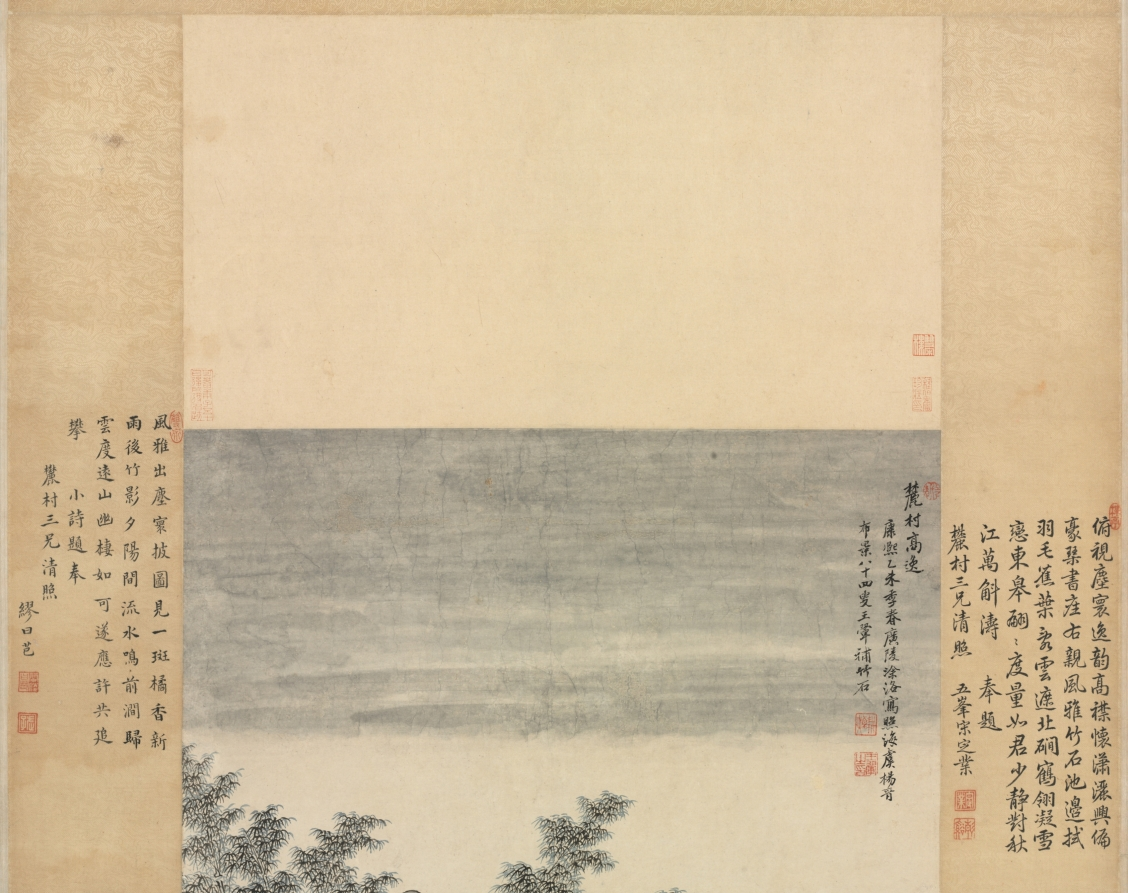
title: Portrait of An Qi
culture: China, Qing dynasty (1644-1911)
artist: Wang Hui (Chinese, 1632–1717)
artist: Tu Luo (Chinese, active c. 1715)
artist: Yang Jin (Chinese, 1644–1728)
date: 1715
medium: hanging scroll; ink and color on paper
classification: Painting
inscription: [印]上下千年. 麓村高逸：康煕乙未季春，廣陵涂洛寫照，海虞楊晉布景，八十四叟王翬補竹石。[印]耕煙; 王翬之印.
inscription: 俯視塵寰逸韻高，襟懷潚灑興偏豪。/ 琴書座右親風雅，竹石池邊拭羽毛。/ 蕉葉亂雲遮北礀，鶴翎凝雪戀東皋。/ 翩翩度量如君少，靜對秋江萬斛濤。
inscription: 知君頗好道，作意洗緐縟。/ 遂窮林亭勝，翛然契幽獨。/ 自得會忘言，餘善時往復。/ 岸幘若有期，把卷一停讀。/ 鶴馴行載正，雲閑斷還續。/ 橘柚欎寒煙，芭蕉瀉深綠。/ 石橋逕屢迴，暗水流亦曲。/ 真心恣奇探，曠景縱遐矚。/ 陶謝不可作，此旨更誰屬。/ 眷焉展斯圖，令我怡心目。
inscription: 逸興迥絶塵，風流仰高躅。/ 側無鹿角巾，横呈豹皮褥。/ 胸藏山壑富，座列琴囊足。/ 橙懸萬顆黄，蕉散一叢綠。/ 泉清鶴景長，樹遠雲光續。/ 披圖識性情，伊人温似玉。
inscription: 風雅出塵寰，披圖見一斑。/ 橘香新雨後，竹影夕陽間。/ 流水鳴前澗，歸雲渡遠山。/ 幽棲如可遂，應許共追攀。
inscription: 蕭灑披襟坐，琴書逸興長。/ 衫分蕉葉碧，冠學竹皮黄。/ 高樹穿雲斷，流泉帶菊香。/ 幽懷真曠達，何地不羲皇。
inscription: 秋色滿林壑，孤琴獨玄閒。/ 境歸簪紱外，道在水雲間。/ 棄智如藏璞，栖心静若山。/ 看君此圖畫，永以謝塵顏。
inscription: 修竹叢蕉坐綠天，君容早歳已如仙。/ 山中寄謝王摩詰，頭白方知住輞川。/ 千樹勝封萬戸侯，西風載滿李衡舟。/ 看君高致輕軒冕，坐享江鄉富貴秋。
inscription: 6 seals unidentified.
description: An Qi, the subject of the portrait, was a second-generation salt merchant from Korea. He used part of his wealth to collect art. At the time this painting was commissioned, An was less than 40 years old. He is represented as a Daoist recluse in nature, informally dressed with attributes such as books and a wrapped guqin instrument, a portrait convention for literati-scholars since the Six Dynasties period (220–589 CE). The local Taihu rock, banana plants, and crane suggest a southern garden and a life in seclusion. An’s portrait is evidence of merchants aspiring to the scholar-official class. According to the inscription, this painting was the joint effort of three men, the eldest and most famous was Wang Hui. While the garden setting is homogenous in style, it contrasts with the application of opaque pigments and shading employed for the depiction of An Qi’s face.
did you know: Seven of An Qi's close friends wrote poetic inscriptions on the silk brocade mount around his portrait.